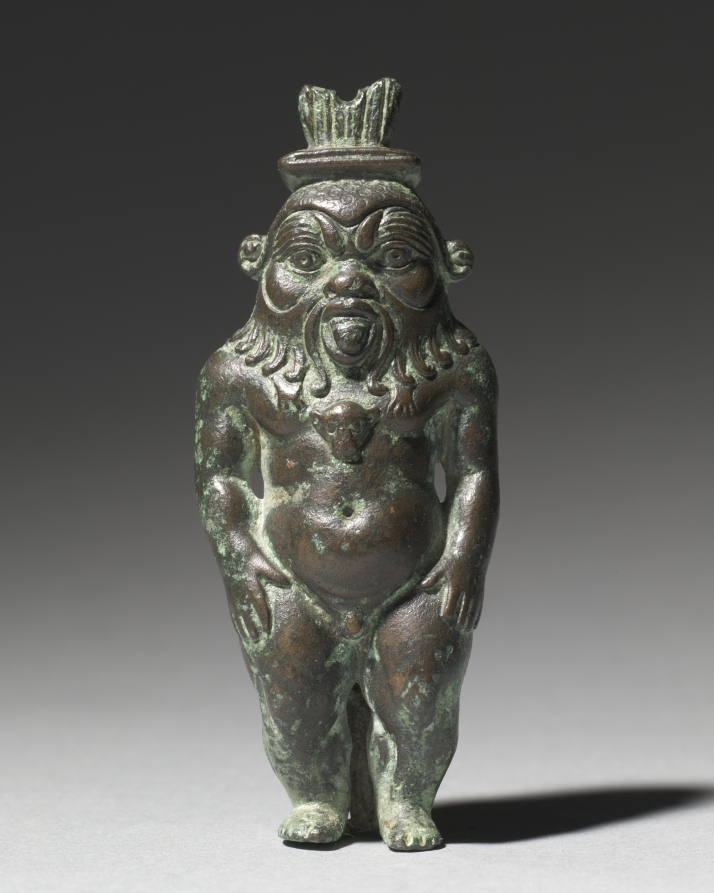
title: Statuette of Bes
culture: Egypt, Late period (715–332 BCE), Dynasty 27 or later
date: 525–30 BCE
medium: bronze, solid cast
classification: Sculpture